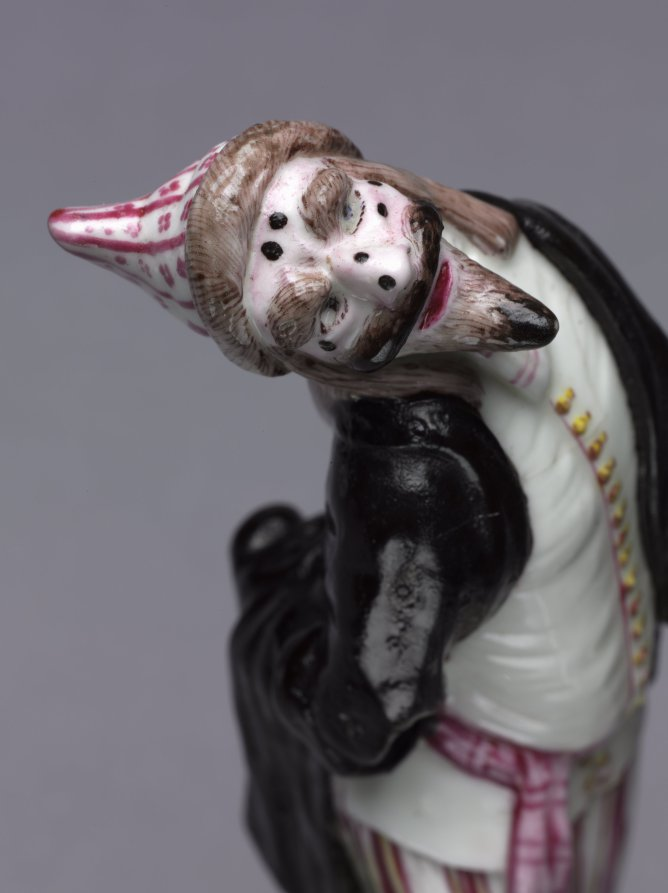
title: Figure of Pantalone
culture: France, Mennecy, 18th century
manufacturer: Mennecy Factory (French)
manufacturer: Mennecy- Villeroy Factory (French)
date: c. 1755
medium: soft-paste porcelain with enamel decoration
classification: Ceramic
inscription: Mennecy-Villeroy factory mark, incised on bottom: "DV"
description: The commedia dell’arte, a form of Italian improvisational theater, became widely popular in 18th-century Europe. This figure, with his prominent beard and distinguishing black robe, represents the character of elderly Venetian merchant Pantalone. Depicted in paintings and porcelain, the popularity of these figures demonstrated the influence of the theater on the tastes of the wealthy.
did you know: In the commedia dell’arte, Pantalone was known for his greed, lust, and buffoonery that made him the target of jokes.